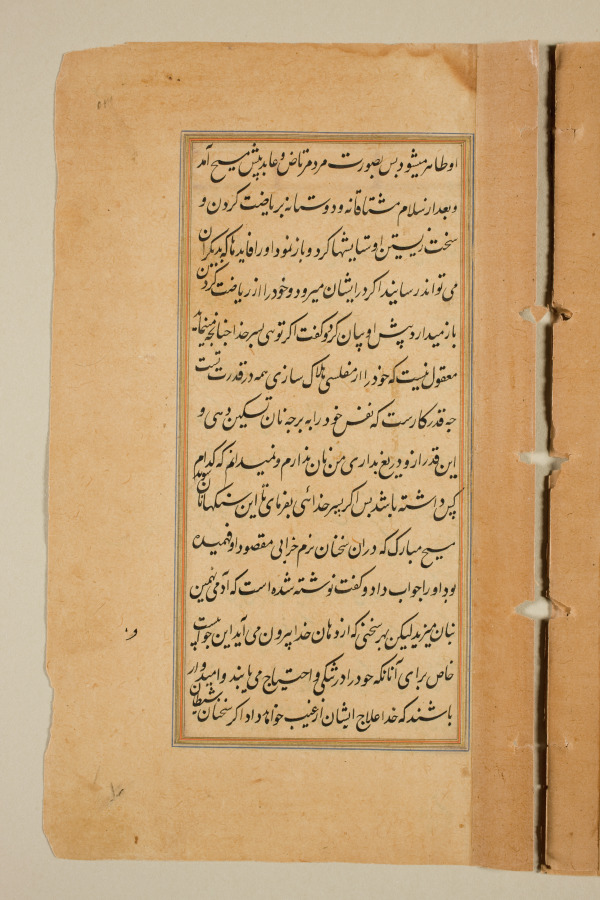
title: Text page from a Mirror of Holiness (Mir’at al-quds) of Father Jerome Xavier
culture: Mughal India, Allahabad, made for Prince Salim (1569–1627)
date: 1602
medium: Ink and gold on paper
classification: Manuscript